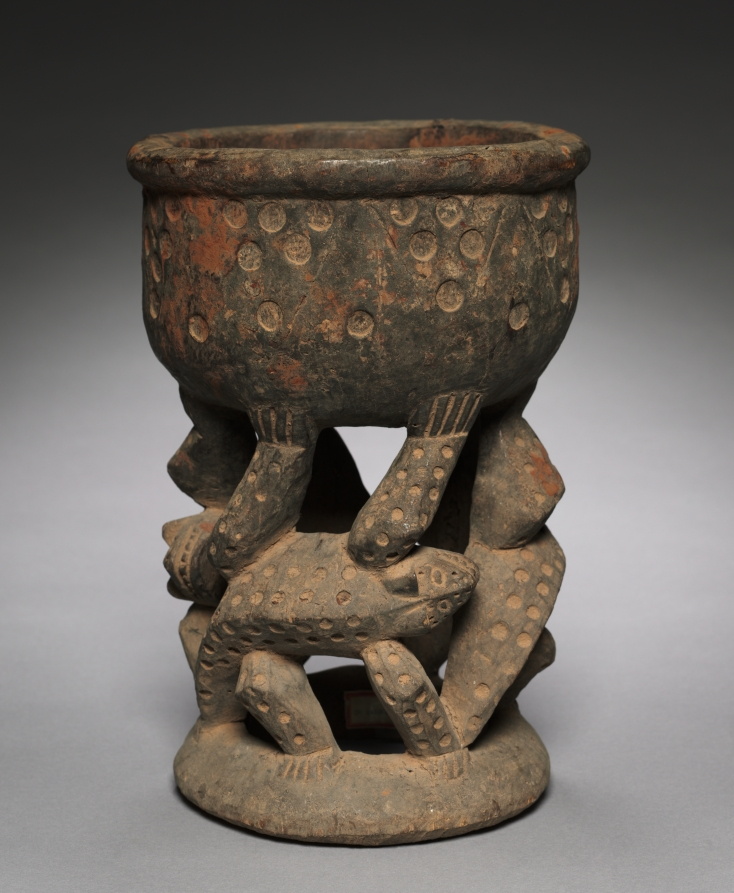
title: Stand or Bowl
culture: Africa, Central Africa, Cameroon, unknown maker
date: early 1900s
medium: Wood and organic materials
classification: Sculpture